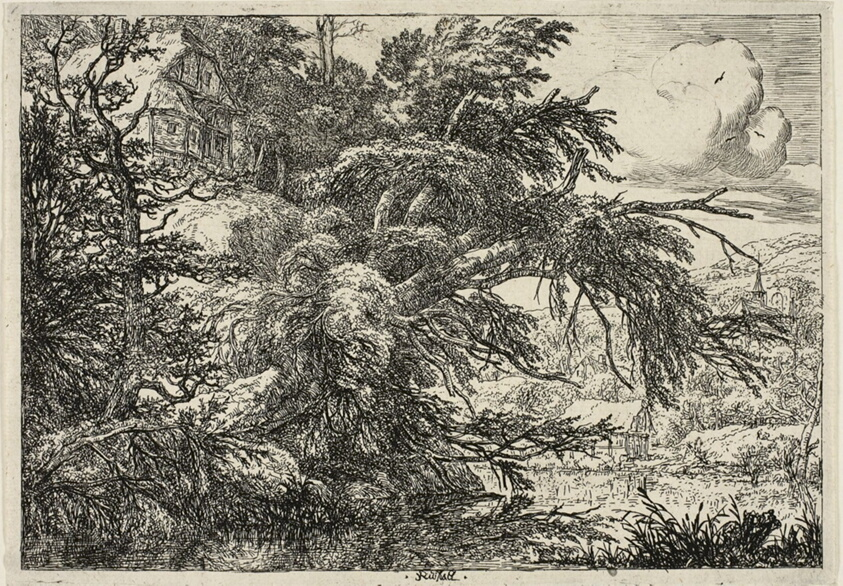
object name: Print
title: Cottage at the Top of a Hill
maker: Jacob van Ruisdael (Dutch, 1628/29-1682)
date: c. 1660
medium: Etching in black on ivory laid paper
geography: Holland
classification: etching; print; prints and drawing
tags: landscapes